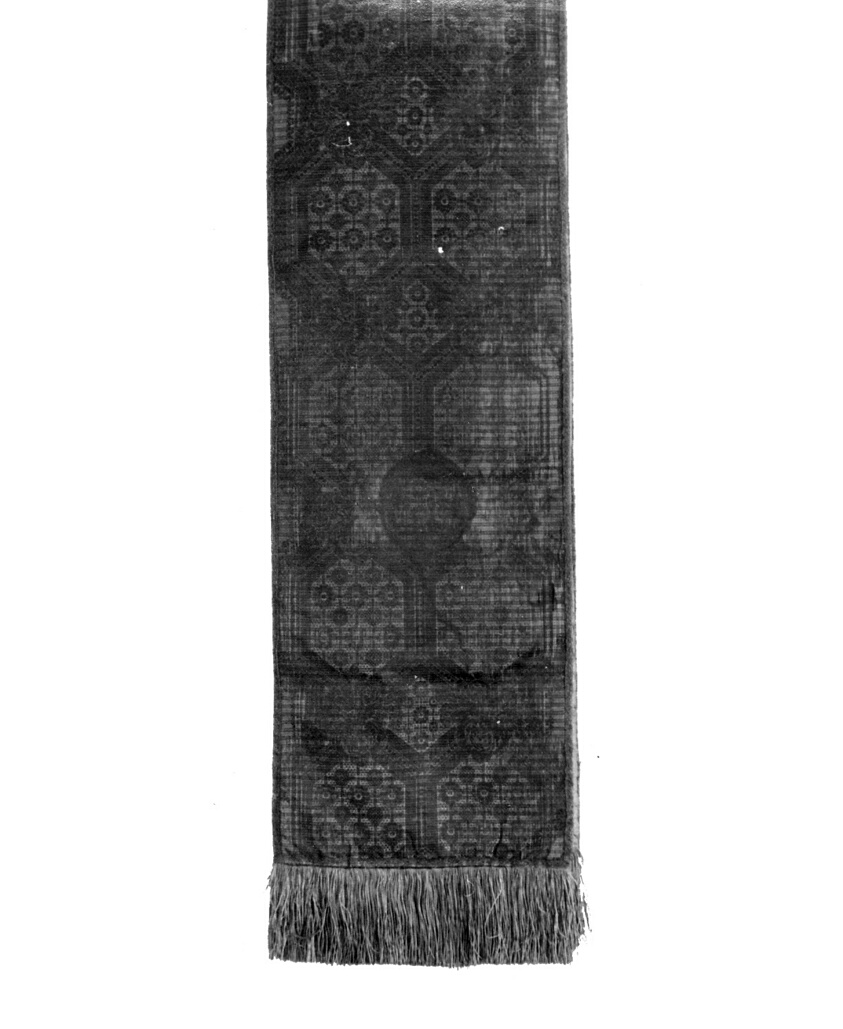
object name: Textile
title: Runner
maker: England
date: 1860/70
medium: Silk, plain weave with supplementary patterning warps; edged with gilt-metal-strip-wrapped silk and silk, bobbin lace braid and extended weft cut fringe; woven on loom with Jacquard attachment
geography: England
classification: textile; weaving